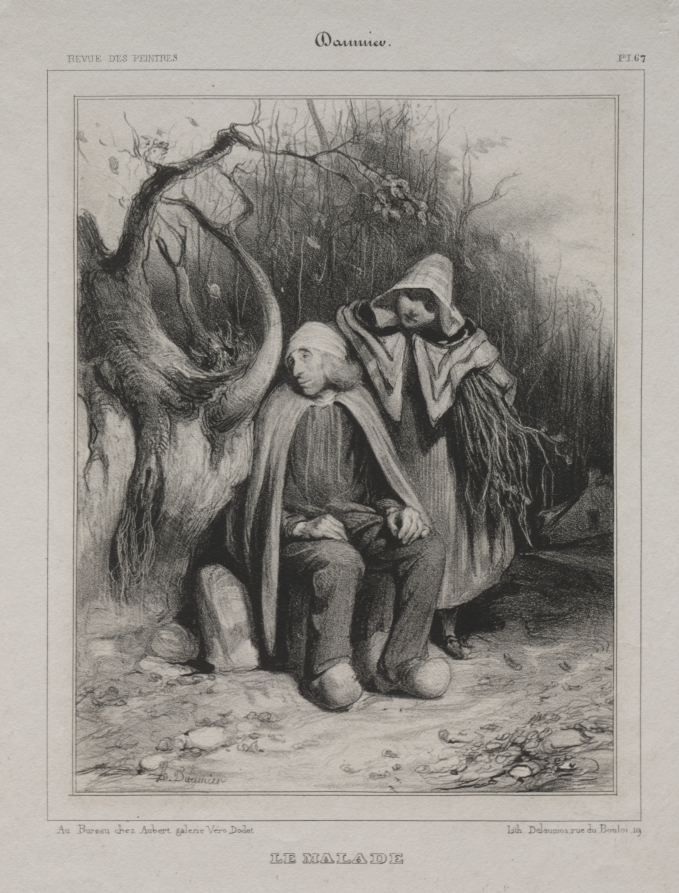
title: The Invalid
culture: France, 19th century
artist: Honoré Daumier (French, 1808–1879)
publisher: Aubert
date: 1835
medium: lithograph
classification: Print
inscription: Lower margin, printed: Au Bureau chez Aubert galerie Véro Dodat / Lith. Delaunios, rue du Bouloi, 19 ; in pencil: V,9V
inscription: Above image, printed: REVUE DES PEINTRES / Daumier / Pl. 67 ; Below image, printed: LE MALADE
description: This print was published in Revue des Peintres as plate 67.